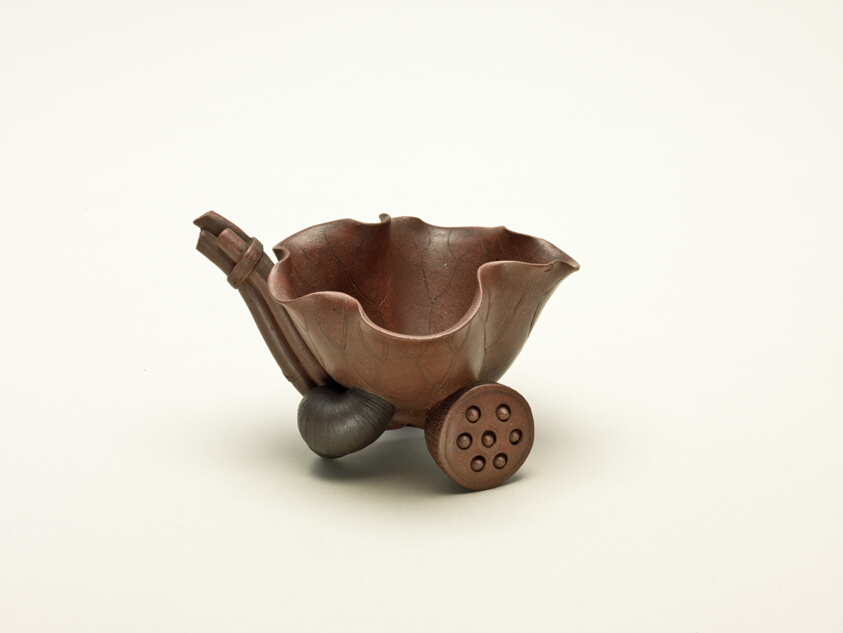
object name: Vessel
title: Lotus Cup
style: Chinese (culture or style)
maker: Chen Mingyuan (Chinese, active 1650/1700)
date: Qing dynasty (1644–1911), mid 17th/18th century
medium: Yixing stoneware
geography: China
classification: drinking vessel; porcelain; asian art; ceramics; vessel